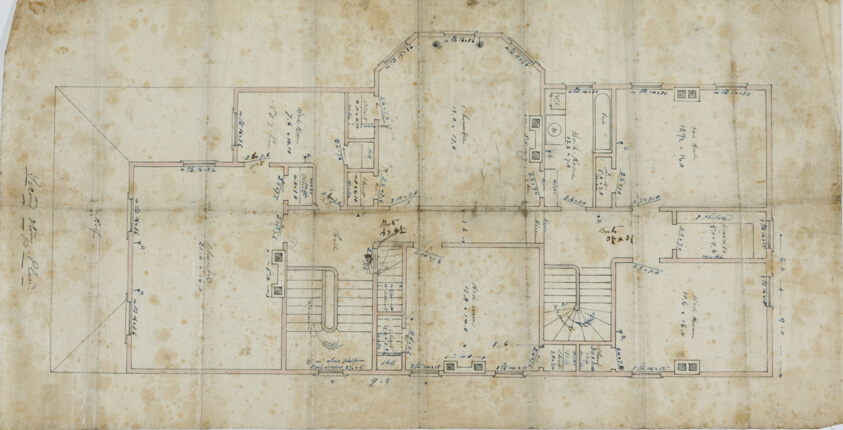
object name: Architectural Drawing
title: Charles R. Larrabee House, Chicago, Illinois, Second Floor Plan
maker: Edward Burling (American, 1819–1892)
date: c. 1863/64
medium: Ink on linen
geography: Chicago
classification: working drawing; architecture; architectural drawing